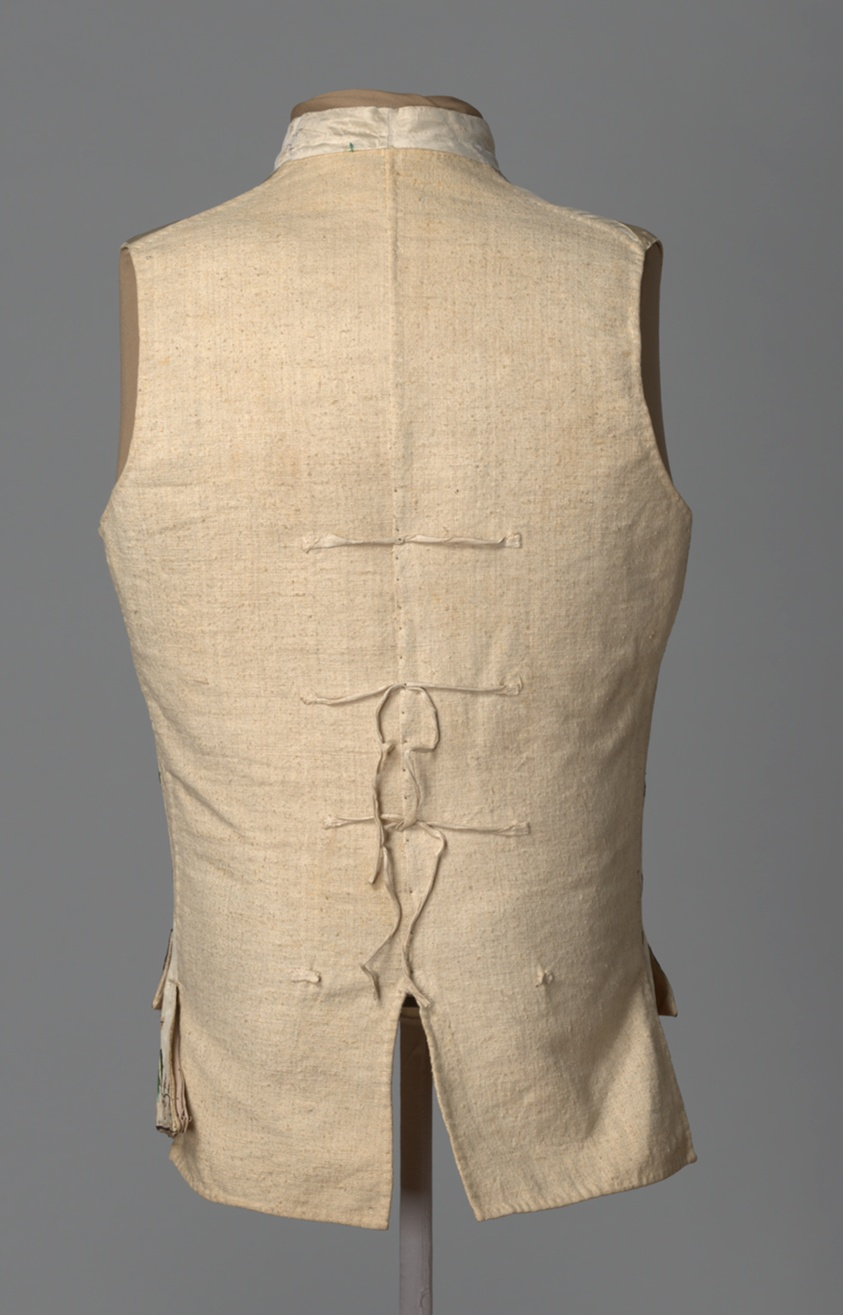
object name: Costume and Accessories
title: Man's Waistcoat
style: 18th Century, Rococo, Neoclassicism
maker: Possibly Lyon, France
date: Embroidered 1780s; altered 1795–1805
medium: Front: Silk, satin-weave foundation, embroidered with silk thread in satin, steam and buttonhole stitches and French knots; embroidered fabric covered buttons; silk, twill weave lining; back: linen, plain weave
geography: France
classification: waistcoat (garment); costume; needlework (visual works); dress (garment); clothing; textile; costume - embroidery; garment; costume - needlework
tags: flowers, roses, fashion, floral, floral motifs